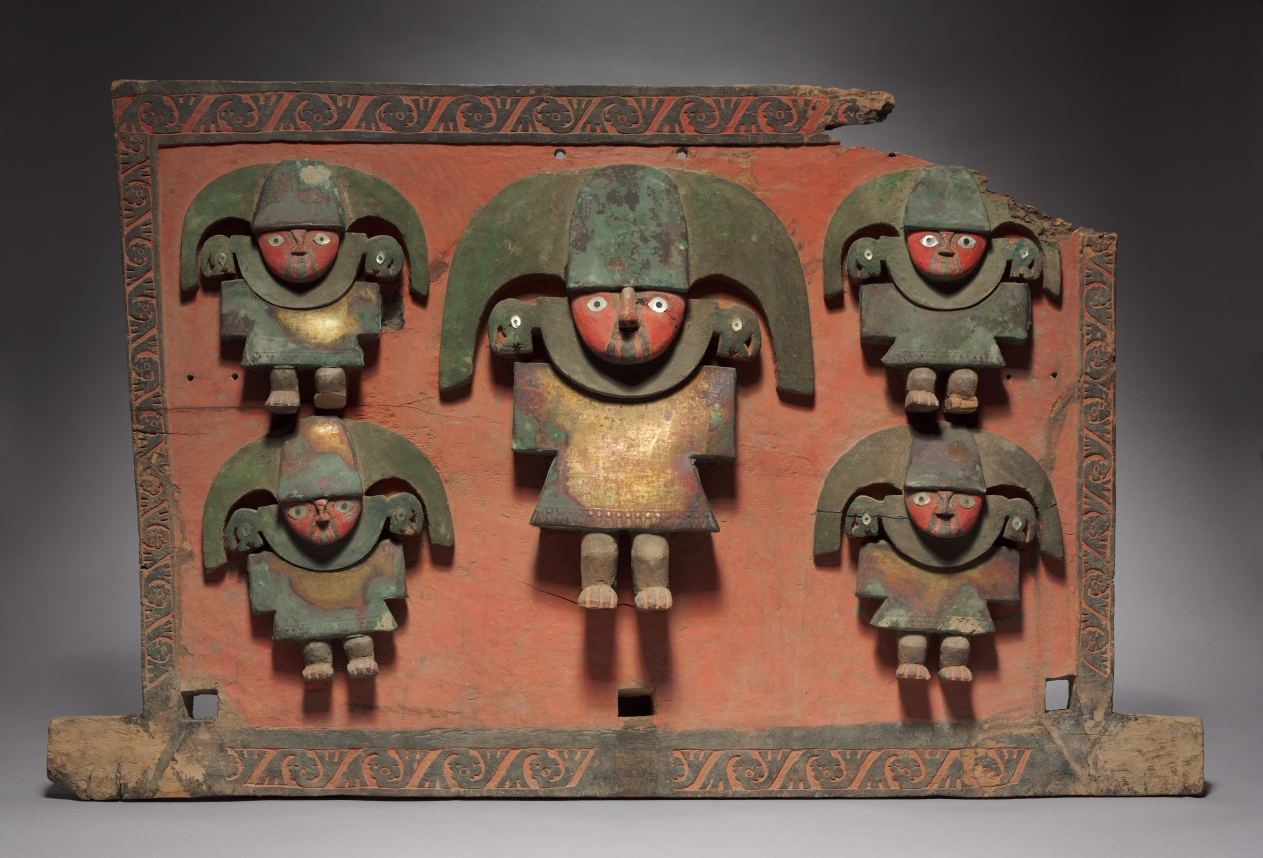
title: Backrest of a Litter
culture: Central Andes, North Coast, Chimú people, late Intermediate period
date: 1185–1275 (radiocarbon date, 95.4% probability)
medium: mixed media: wood, gold alloy, pigment, shell inlay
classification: Sculpture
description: This rare, dramatic object served as the back support of a litter carried by human porters, a mode of transport reserved for honored members of many societies without draft animals or wheeled vehicles. The simple, bold figures—perhaps a Chimú lord and four officials—all wear wide collars, tunics, and crescent headdresses that are either brightly painted or covered with golden but now-corroded sheet metal. The holes at the bottom probably served as lashing points for a beam that supported the litter's seat.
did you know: Cinnabar, a toxic mercuric sulfide, was used to color the red background and faces of the figures.